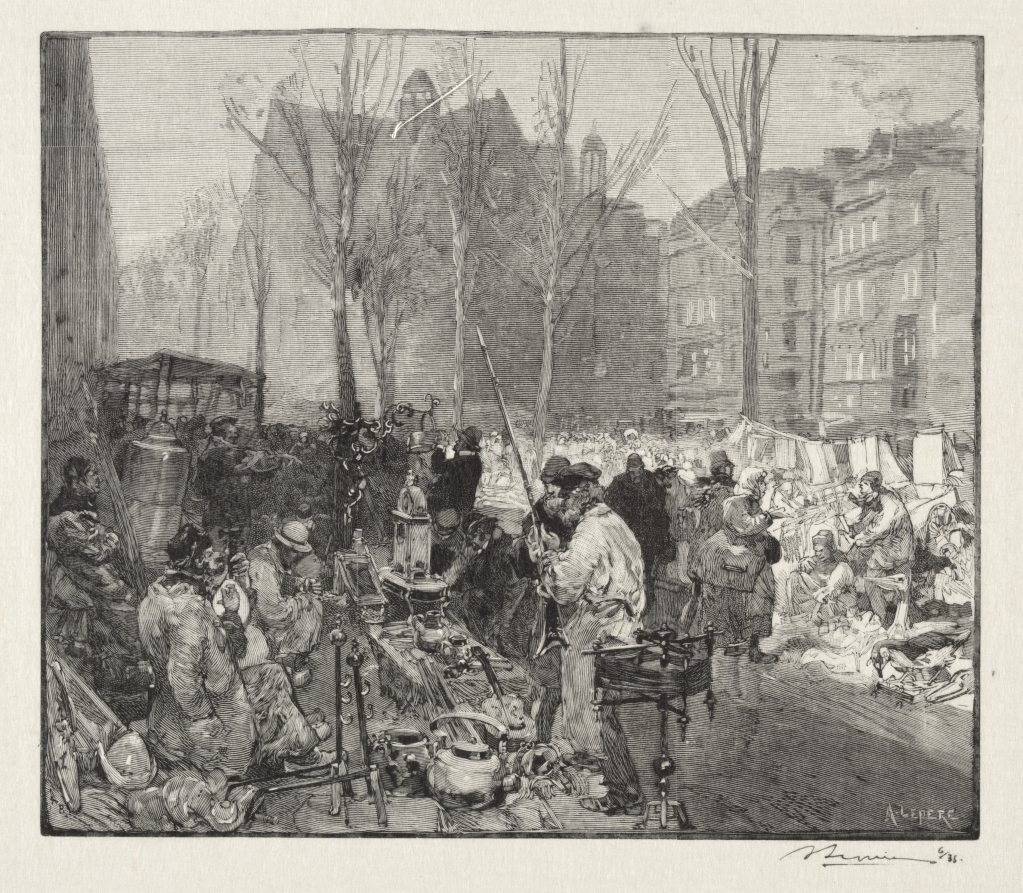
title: Marché à la Ferraille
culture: France, 19th-20th century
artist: Auguste Louis Lepère (French, 1849–1918)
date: c. 1870–1918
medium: wood engraving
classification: Print